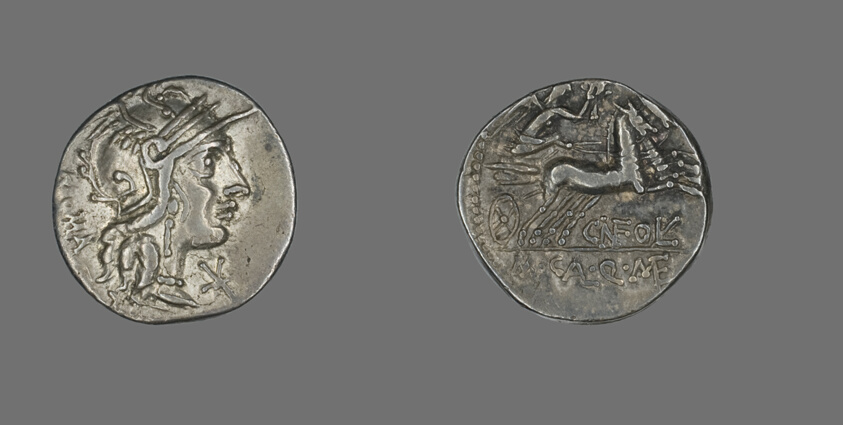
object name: Coin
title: Denarius (Coin) Depicting the Goddess Roma (?)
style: roman (ancient, style or period), ancient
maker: Roman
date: 117-116 BCE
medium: Silver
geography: Roman Empire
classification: coin; ancient art